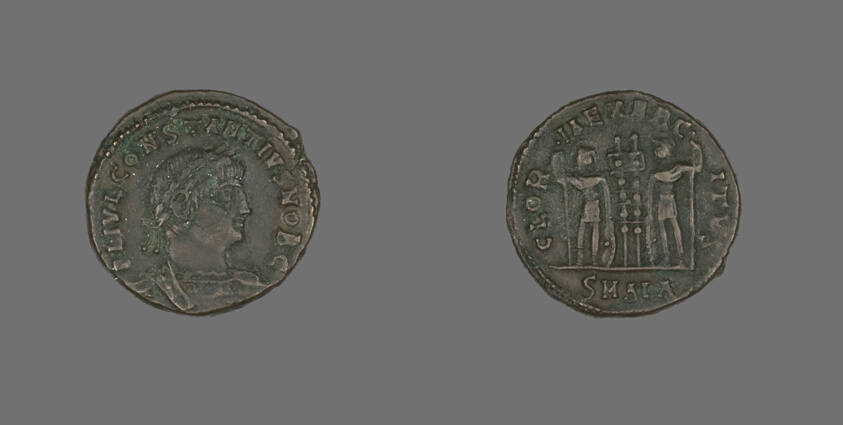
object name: Coin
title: Coin Portraying Emperor Constantius II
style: roman (ancient, style or period), ancient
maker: Roman, minted in Samia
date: 337-361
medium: Bronze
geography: Roman Empire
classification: coin; ancient art